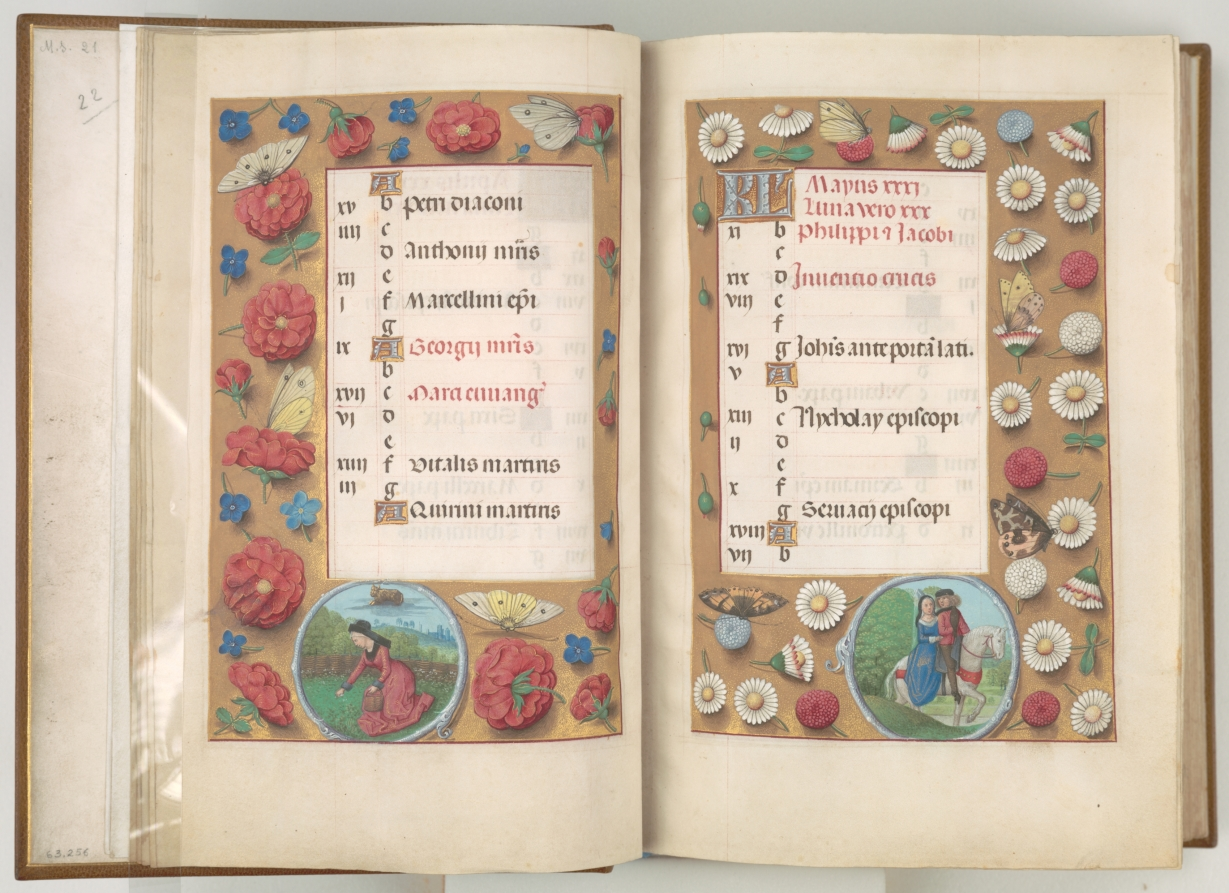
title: Hours of Queen Isabella the Catholic, Queen of Spain: Fol. 6r, May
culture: Flanders, Ghent and Bruges, late 15th century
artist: Master of the First Prayerbook of Maximillian (Flemish, c. 1444–1519)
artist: and Associates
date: c. 1500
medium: ink, tempera, and gold on vellum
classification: Bound Volume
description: This manuscript was illuminated by a circle of at least five highly organized manuscript painters active in the Flemish cities of Ghent and Bruges. The principal illuminator was Alexander Bening, who painted the majority of the book's miniatures. Manuscripts produced by this circle of artists are renowned for the decoration of their borders, which typically feature a rich variety of realistically painted flowers, birds, and butterflies. This prayer book, called a book of hours, was intended not for a cleric but for the private devotions of a lay person—in this case, Isabella the Catholic, Queen of Spain (1451–1504); her coat of arms embellishes the book's frontispiece. It is unlikely that the book was commissioned by the Queen herself; rather, she probably received it as a diplomatic gift from someone courting her patronage, perhaps Cardinal Francisco Jimenez de Cisneros. A Franciscan friar, Jimenez was dependent upon Isabella for his advancement, first to the post of Queen's confessor in 1492, and then to Archbishop of Toledo in 1495.